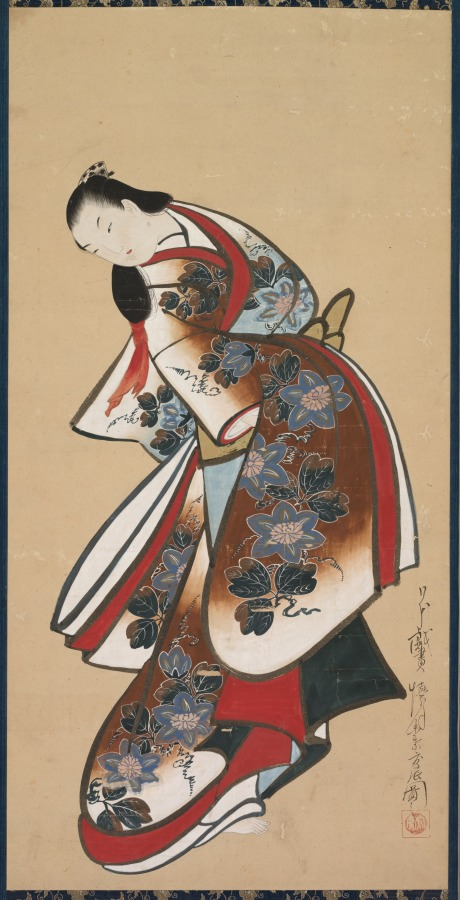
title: Courtesan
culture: Japan, Edo period (1615–1868)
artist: Kaigetsudō Doshin (Japanese, active 1711–1736)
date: early 1700s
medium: hanging scroll; ink and color on paper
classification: Painting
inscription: Signed: Japanese painting for amusement, this was painted by Doshin, the last leaf of Kaigetsu (Nihon giga Kaigetsu matsuyo Doshin kore [o] zu [su]) Sealed: Ando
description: Kaigetsudō Doshin was one of five painters in a studio operating under Kaigetsudō Ando (about 1671–1743) in the Asakusa area of Edo (now Tokyo). The workshop specialized in portraits, like this one, of high-ranking courtesans of the Yoshiwara district. Characteristic of those works, this painting features strong ink delineation of the subject’s twisting form and bold patterns in the kimono, as well as the absence of any sort of setting.